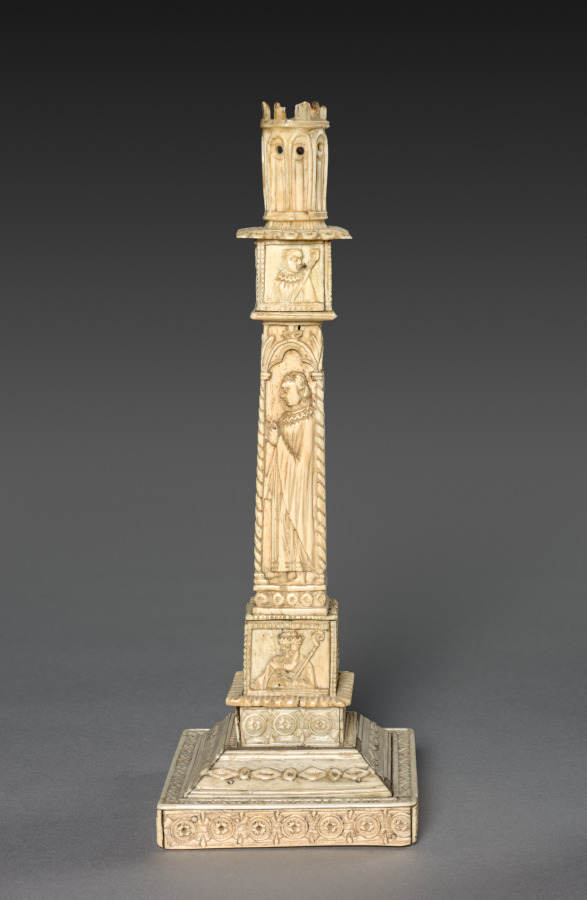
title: Candlestick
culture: Italy, 15th century style (possibly 19th-early 20th century)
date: 1800s - early 1900s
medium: ivory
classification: Ivory